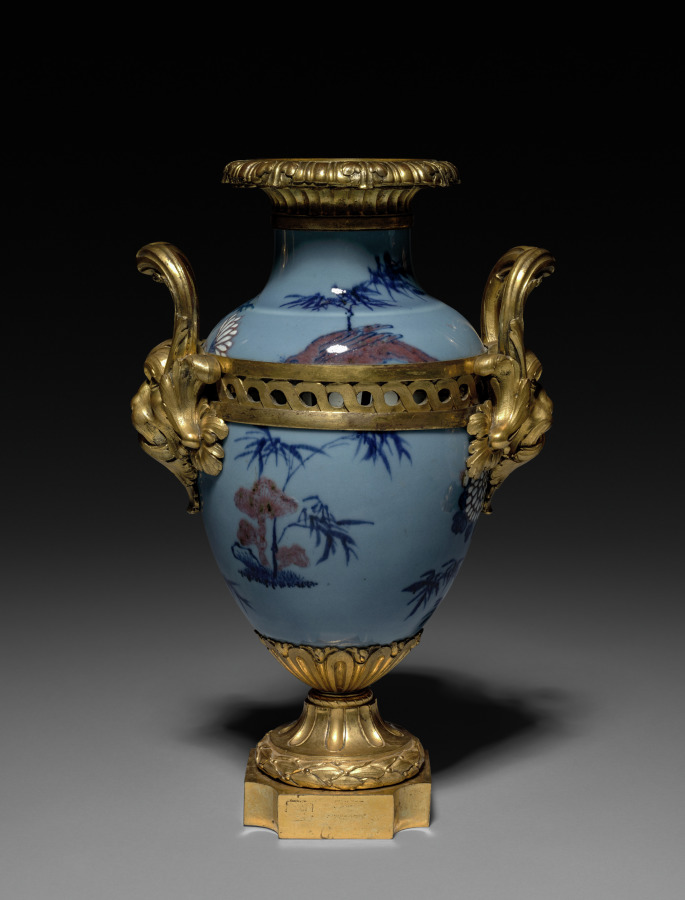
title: Vase for a Garniture Set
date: 1736–1770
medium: Chinese hard-paste porcelain, gilt bronze, enameled metal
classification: Furniture and woodwork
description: The fascination with Chinese porcelain among aristocratic circles increased during the reign of Louis XV. In reaction to the perceived excesses of elaborate naturalistic ornament of the 1750s, mount makers increasingly turned to neoclassical designs, known as Goût Grec (Greek taste) in the 1760s and 1770s. These beautifully chased gilt-bronze mounts feature classical Greco-Roman motifs such as lion masks, acanthus and laurel leaves, and pilasters.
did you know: A set of vases and clock, connected visually by the use of the same materials, often adorned a mantlepiece or the top of a large piece of furniture, such as a commode or console, within a room.